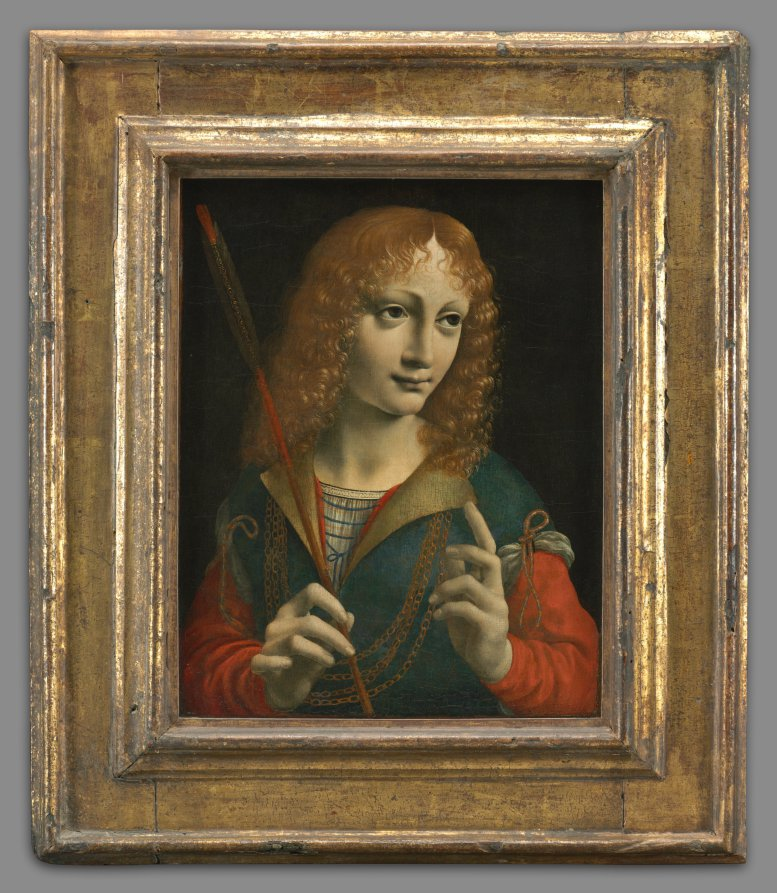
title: Portrait of a Youth as Saint Sebastian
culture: Italy, 15th century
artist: Marco d'Oggiono (Italian, 1460-1524)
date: late 1480s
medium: oil on wood, transferred to pressed wood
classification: Painting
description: Sebastian, a bodyguard for the ancient Roman emperor Diocletian, was shot with arrows and was eventually drowned for his commitment to Christianity. While the arrow alludes to Saint Sebastian, the young man’s clothing dates to the late 1400s, indicating that this is a contemporary portrait, rather than an image of the historical saint. This haunting image was influenced by the paintings of Leonardo da Vinci (1452–1519), particularly in the artist’s use of smoky shadows (called sfumato) to model the flesh. It was painted by Marco d’Oggiono, a Milanese artist who worked in Leonardo’s studio.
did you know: While Marco d'Oggiono made numerous copies of the masterpieces of his teacher Leonardo da Vinci, this is an original composition.